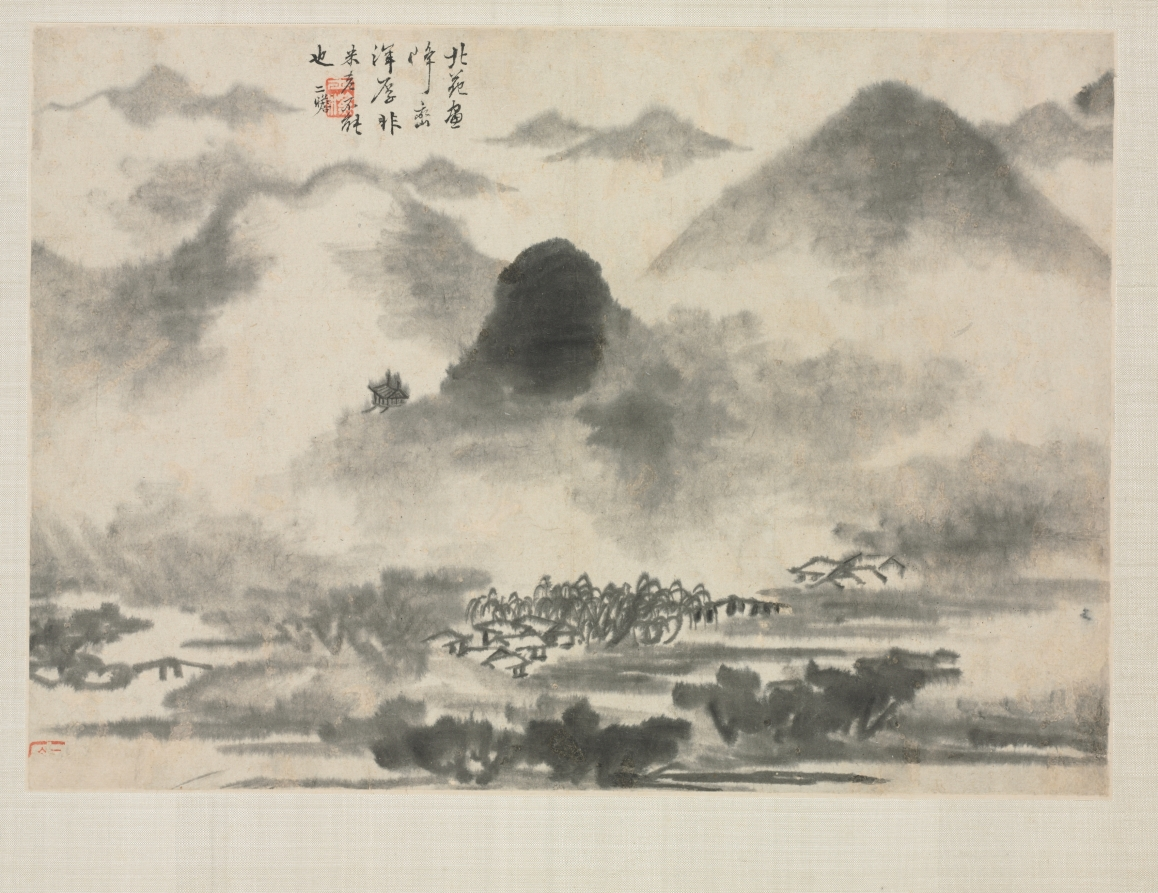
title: Landscape Album in Various Styles: Landscape after Mi Fei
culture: China, Qing dynasty (1644-1911)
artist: Zha Shibiao (Chinese, 1615–1698)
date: 1684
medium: album leaf, ink and light color on paper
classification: Painting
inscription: Artist's inscription, signature, and seal: 北苑 Beiyuan's [Dong Yuan 董源 (c. 934–c. 962)] paintings of ridges and peaks are massive and rich. No one but the Elder Mi [Fu 米黻] was capable of painting them. [seal] Shibiao. [signed] Erzhan 二瞻.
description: Zha Shibiao, a native of Anhui province, moved to Yangzhou later in his career, like so many of his fellow countrymen. At age 68, he painted this album with seasonal landscapes in various styles. Painted in fresh colors and wet strokes, all depict typical scenes of Jiangnan, the Yangzi delta: a herdboy on a buffalo wading through water, boating on the stream to the Peach Blossom Spring at Wulin, a waterfront town shrouded in mist, a scholar on his donkey enjoying the red autumn leaves, and drinking tea on a boat while watching migrating birds.